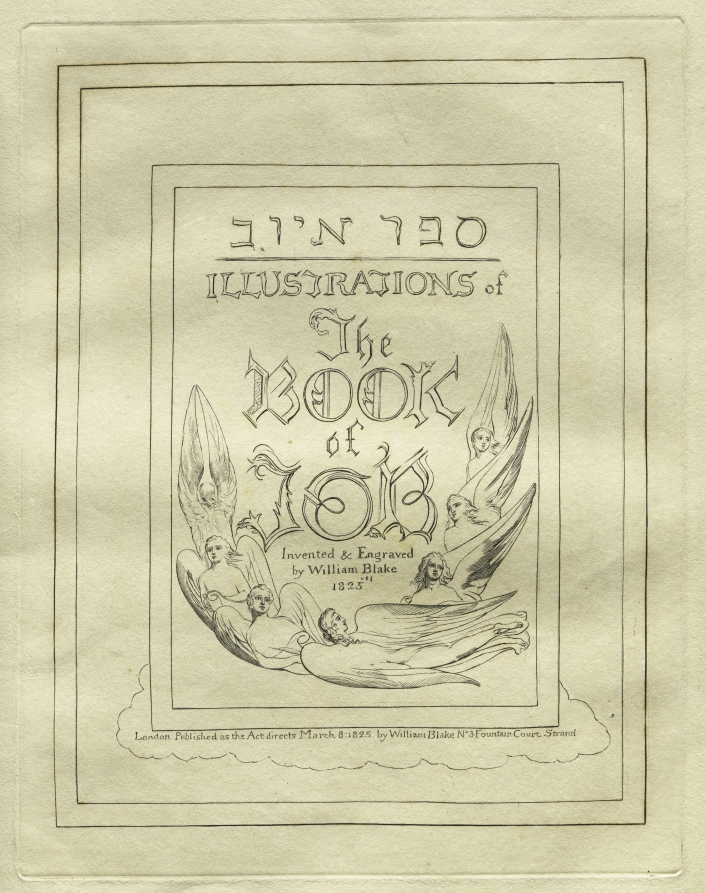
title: The Book of Job: Title Page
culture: England, 19th century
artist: William Blake (British, 1757–1827)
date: 1825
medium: engraving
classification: Print